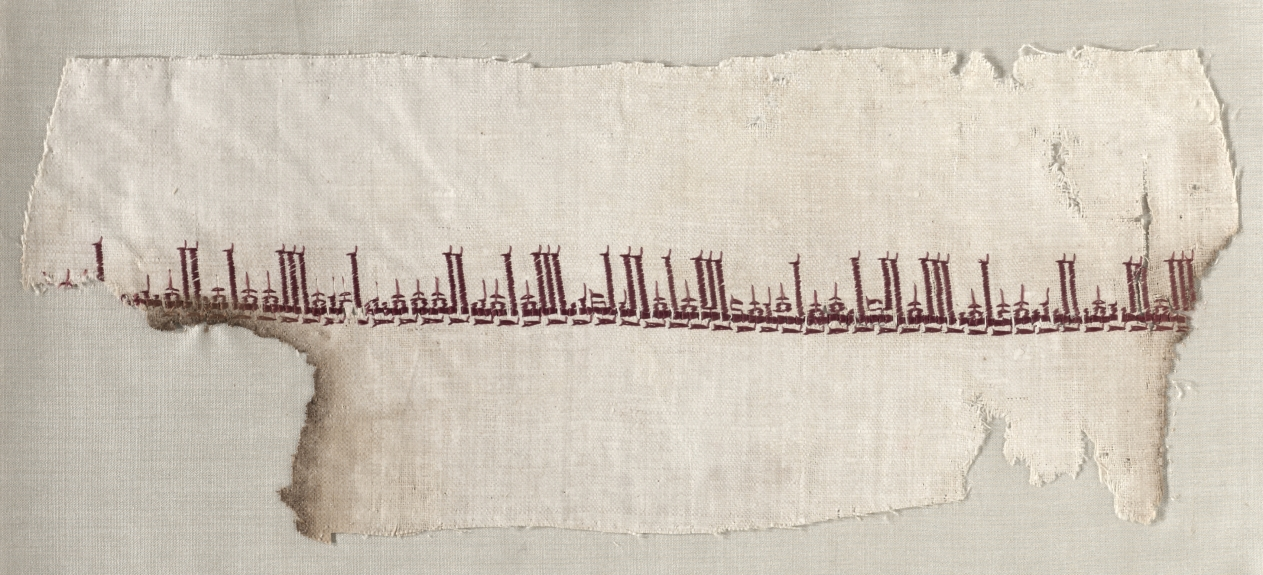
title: Fragment of a Tiraz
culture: Egypt, Ikhshidid period, Caliphate of al-Radi, AH 323-328 (A.D. 934-940)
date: 934 – 940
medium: silk embroidery on linen tabby ground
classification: Embroidery